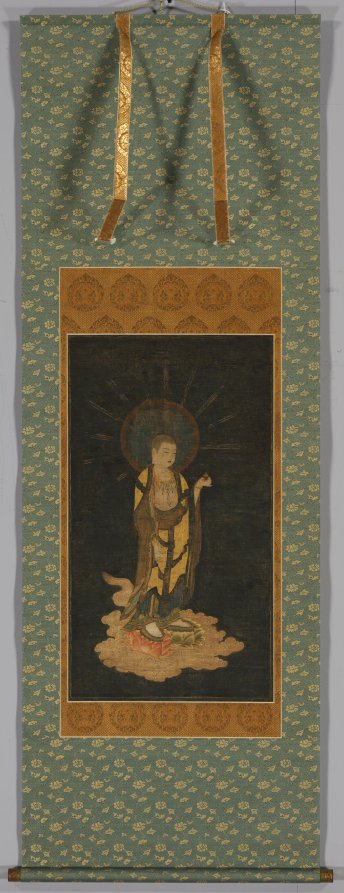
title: Welcoming Descent of Jizō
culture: Japan, Kamakura period (1185–1333)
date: 1200s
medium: Hanging scroll; ink, color, gold, and cut gold on silk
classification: Painting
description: The bodhisattva Jizō—an enlightened being who refuses to become a Buddha in order to aid other beings in their quest for enlightenment—appears as a Buddhist monk carrying a wish-fulfilling jewel and a golden staff topped with rings. He descends with each of his feet balanced atop a lotus, borne by clouds to save a suffering believer who has called out for his help. Jizō is well known among Buddhists for rescuing people from the many Buddhist hells.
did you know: Jizō is well known for rescuing people from the many Buddhist hells.